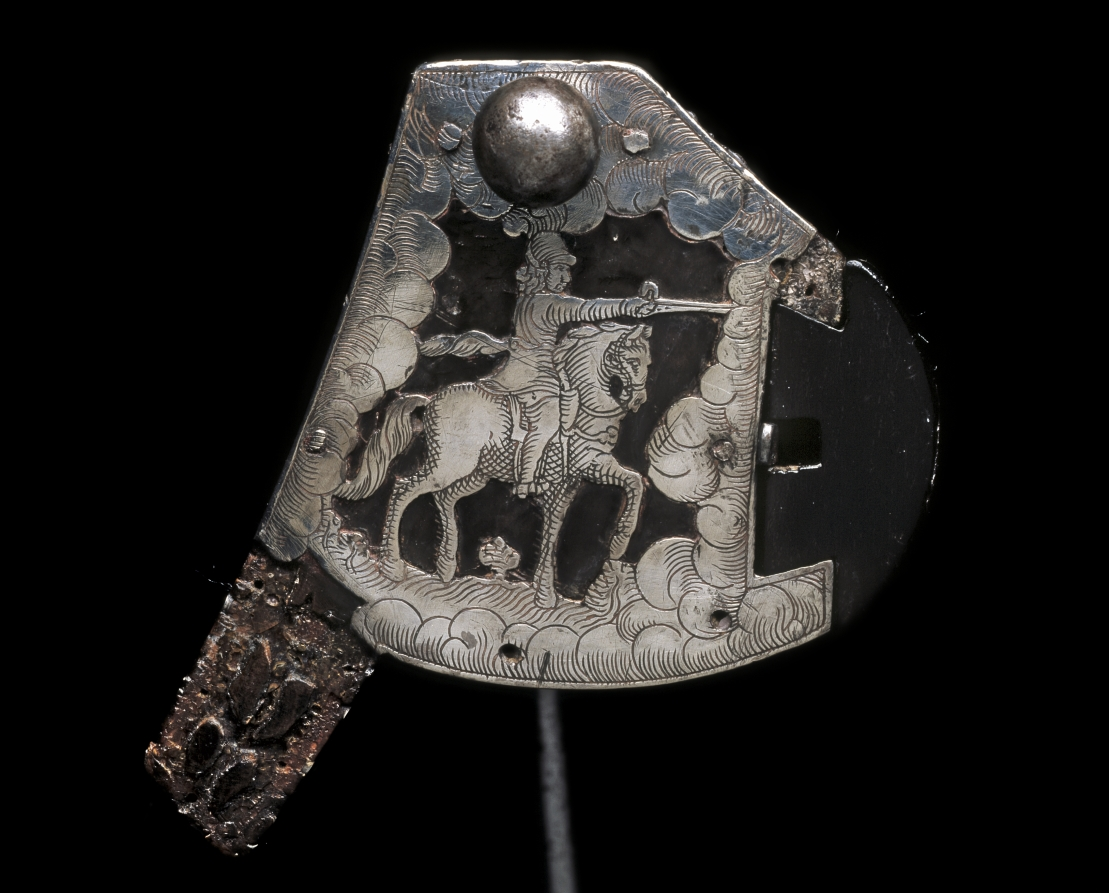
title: Wheel-Lock Hunting Rifle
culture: Austria, Ferlach, mid 17th Century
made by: Hans Schmidt (Austrian, 1669)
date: mid-1600s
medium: steel, varnished wood (walnut) stock decorated with inlaid silver wire and appliqués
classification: Arms and Armor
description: The barrel of this hunting piece is marked with the letters "GS" within a shield, the likely initials of the owner, who was probably a member of the Order of the Golden Fleece as indicated by the escutcheon on the stock.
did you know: A similar rifle made for another member of the Order of the Golden Fleece, Graf Sigmund von Dietrichstein, is preserved in Vienna.